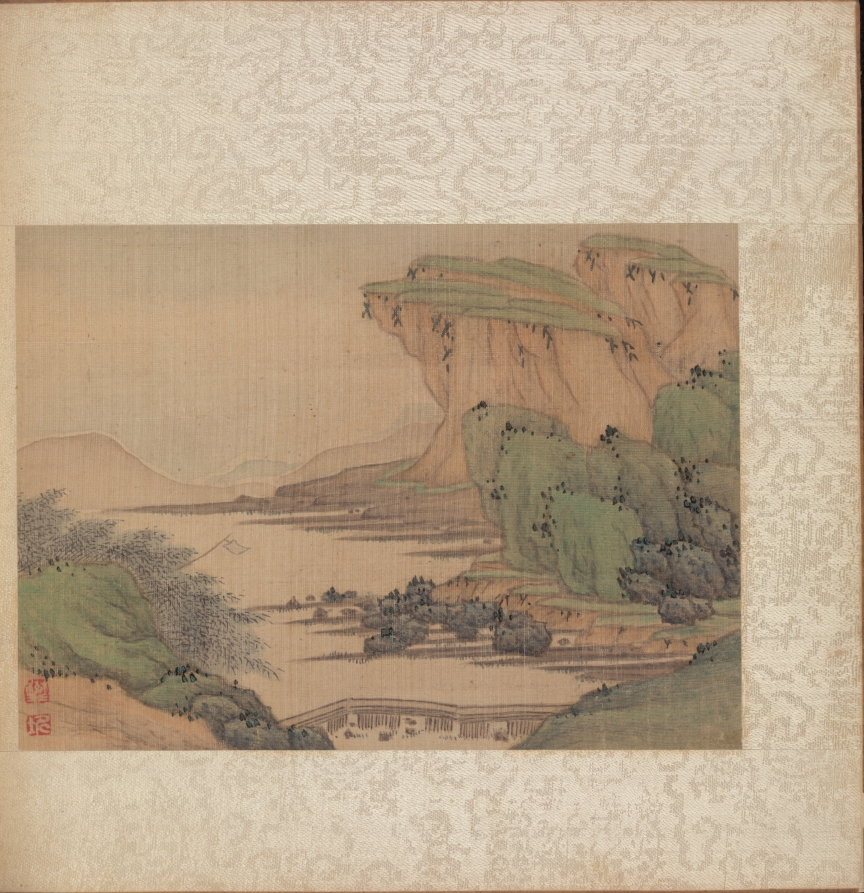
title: Album of Miscellaneous Subjects, Leaf 2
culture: China, Qing dynasty (1644-1911)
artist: Fan Qi (Chinese, 1616–after 1694)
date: early 1650s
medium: album leaf, ink and color on silk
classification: Painting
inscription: Artist seal: Fan Qi 樊圻. Poem by Han Tan 韓菼 (1637–1704): A thousand feet of red cliffs look like a sculptured flower of Fu-yung;/ In one glance, the long bridge joins adjacent ridges./ Furthermore a wine shop stands in a bamboo grove;/ The fellow who bought some good wine is drunk on the eastern shore of the stream.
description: Fan Qi's painting on this second leaf of the album is, perhaps, based on Du Mu's poetic line: The herdboy pointed to the distant Apricot Village. Han Tan's calligraphic colophon facing the painting reads: A thousand feet of red cliffs look like a sculptured flower of furong; In one glance, the long bridge joins adjacent ridges. Furthermore a wine shop stands in a bamboo grove; The fellow who bought some good wine is drunk on the eastern shore of the stream.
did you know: A wine shop's flag is visible above the bamboo grove.